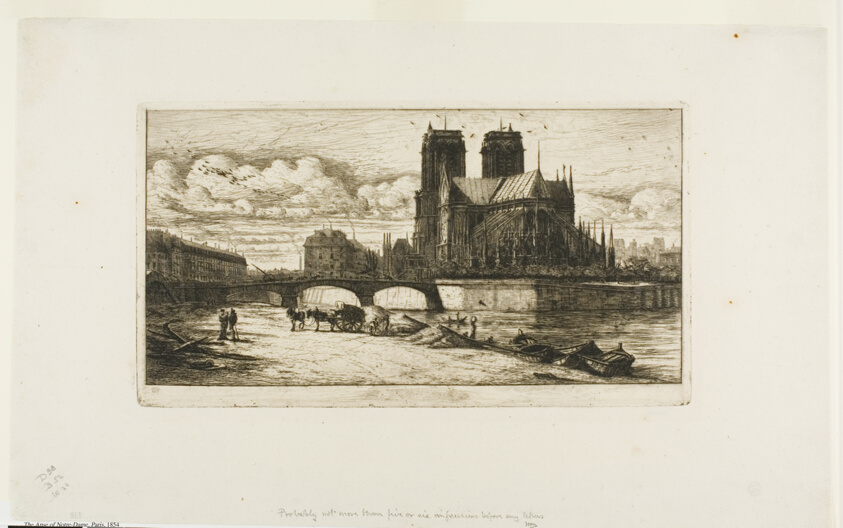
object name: Print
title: The Apse of Notre-Dame, Paris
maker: Charles Meryon (French, 1821-1868)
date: 1854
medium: Etching and drypoint on ivory laid paper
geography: France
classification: etching; print; prints and drawing